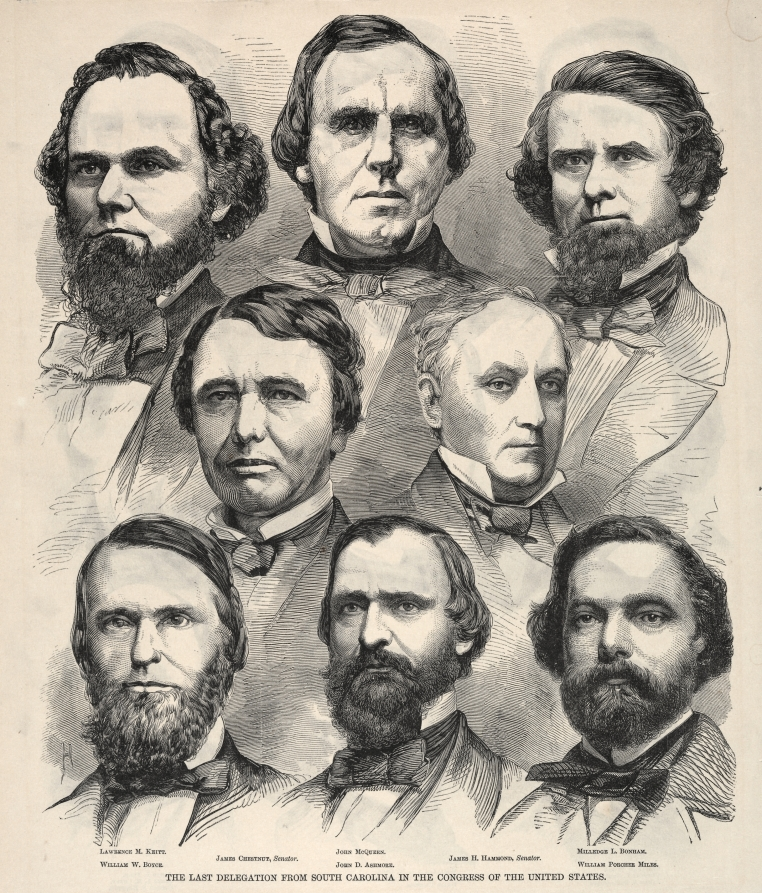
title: The Last Delegation from South Carolina in the Congress of the United States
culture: America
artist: Winslow Homer (American, 1836–1910)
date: 1860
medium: wood engraving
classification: Print